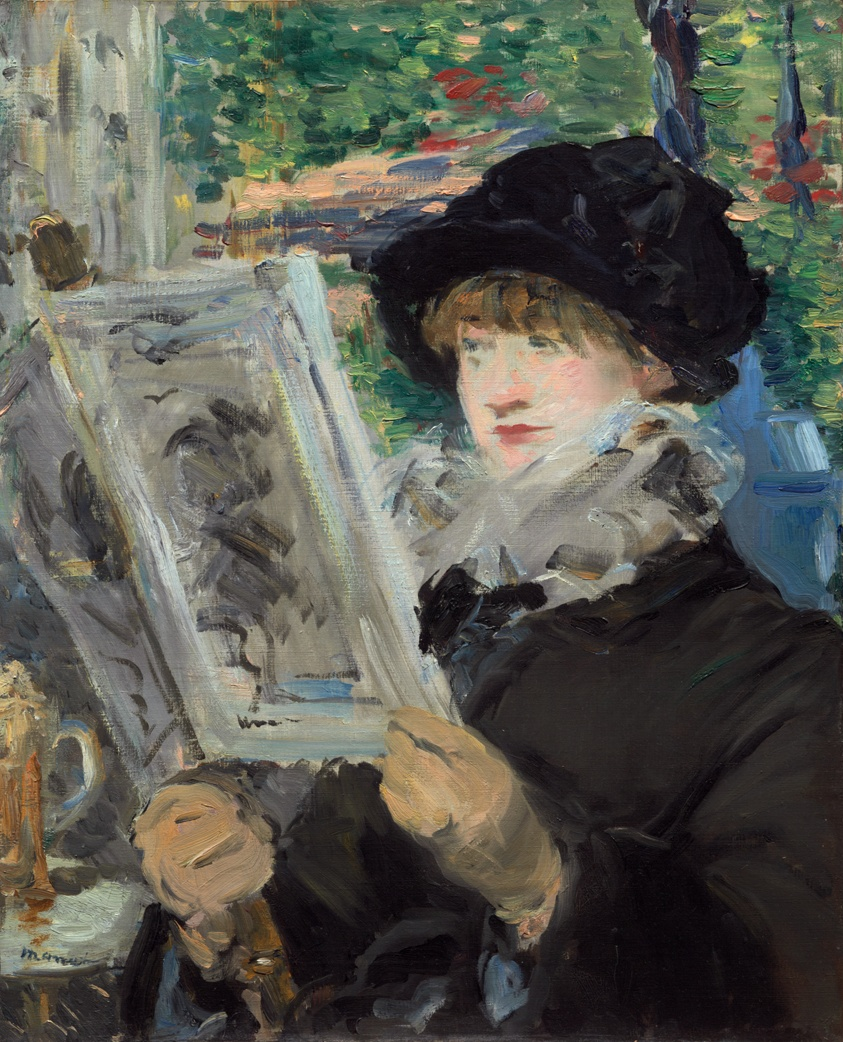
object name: Painting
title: Woman Reading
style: Impressionism, nineteenth century, 19th century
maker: Édouard Manet (French, 1832–1883)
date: 1880–82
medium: Oil on canvas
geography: France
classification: oil on canvas; french; paint; oil paintings (visual works); painting; european painting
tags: everyday life (genre), table, reading, painting, magazine, floral, fashion, black (color), tankard, beer, women, portraits, leisure, urban life, Century of Progress, world's fairs, Chicago World's Fairs